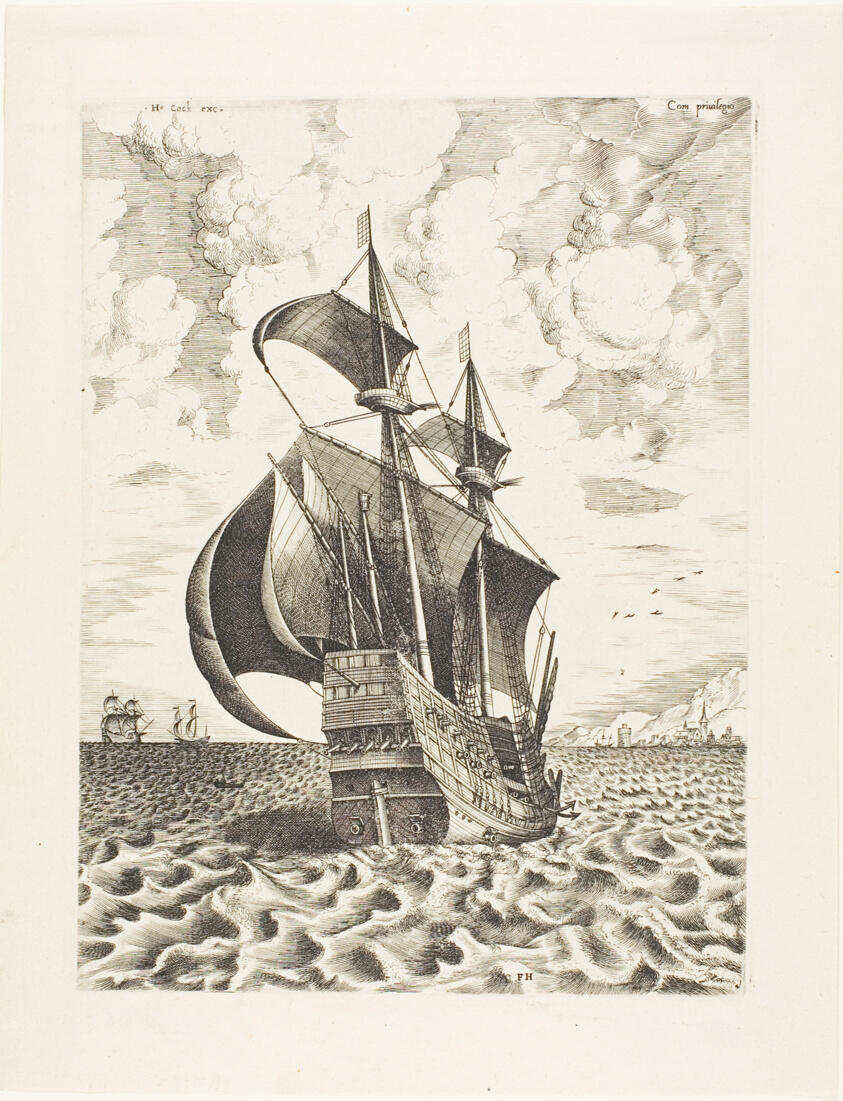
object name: Print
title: Armed Four-Master Sailing Towards a Port, from The Sailing Vessels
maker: Frans Huys (Flemish, c. 1522-1562); after Pieter Bruegel, the elder (Flemish, 1525/30-1569); published by Hieronymus Cock (Flemish, c. 1510–1570)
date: c. 1560–62, published 1665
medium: Engraving in black on ivory laid paper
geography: Flanders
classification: etching; print; prints and drawing